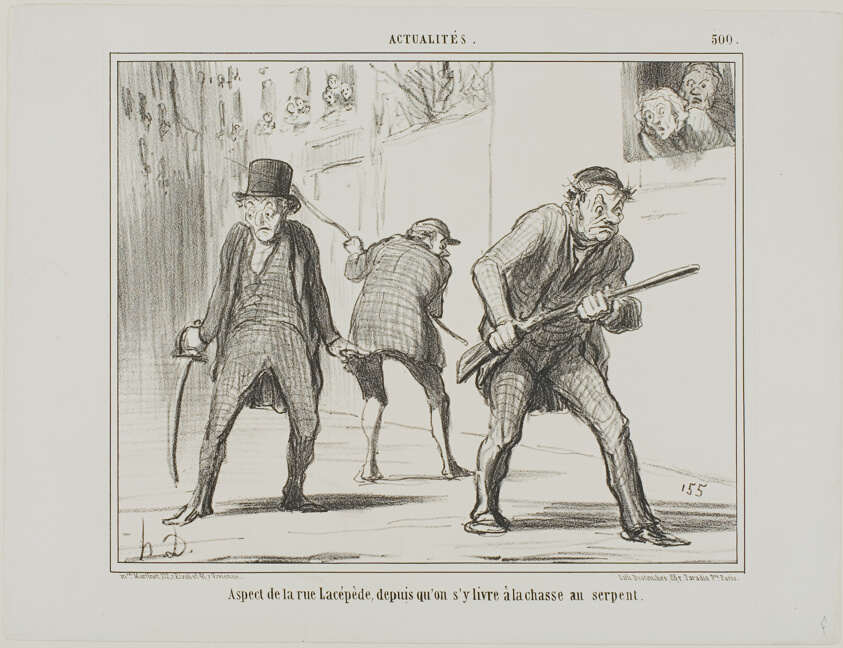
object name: Print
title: View of rue Lacépède during the hunt for a serpent, plate 500 from Actualités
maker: Honoré Victorin Daumier; French, 1808-1879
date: 1858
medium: Lithograph in black on white wove paper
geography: France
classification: lithograph; print; prints and drawing